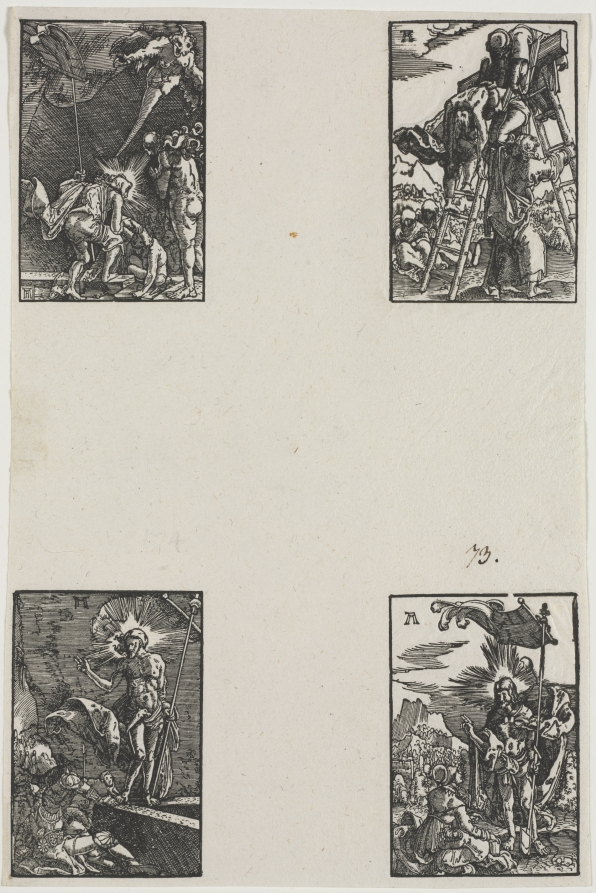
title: The Fall and Redemption of Man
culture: Germany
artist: Albrecht Altdorfer (German, c. 1480–1538)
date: c. 1515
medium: woodcut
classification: Print